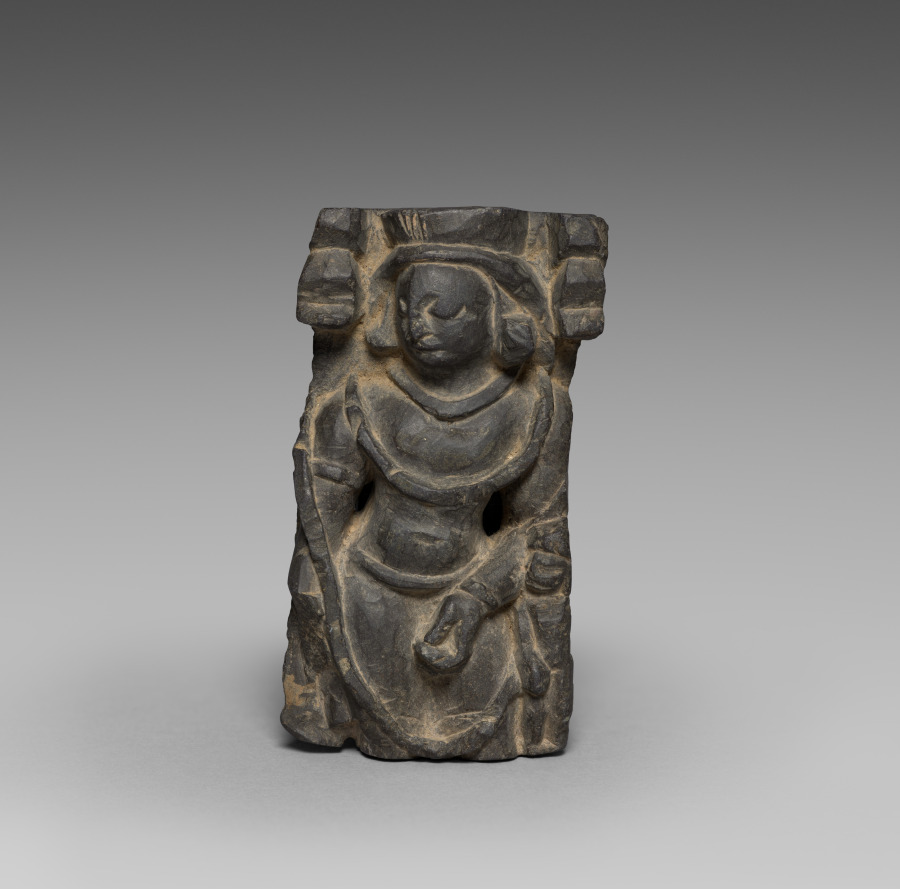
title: Male Figure, Possibly Indra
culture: Pakistan, Gandhara, possibly Swat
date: 300s–400s CE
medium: schist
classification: Sculpture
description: This carving appears to be unfinished, showing only the broad strokes of the male figure. The flat-topped crown is characteristic of Indra, which may be the identity of this figure.